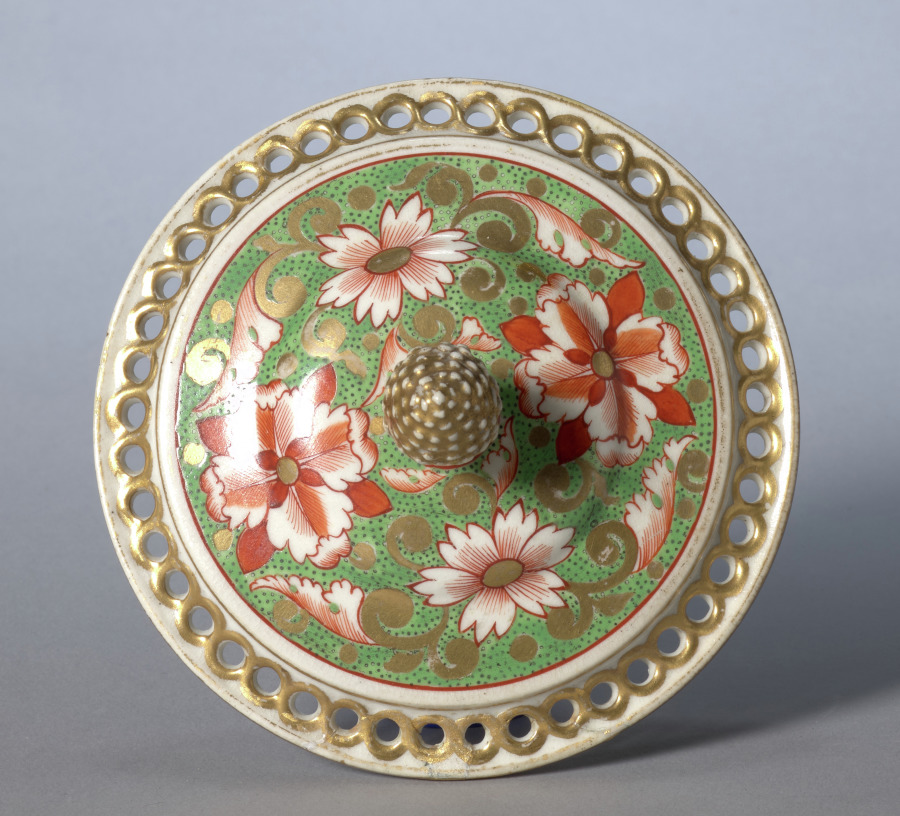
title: Cover for a Potpourri Vase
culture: England, Derby, 19th century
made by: Derby (Crown Derby Period) (British)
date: c. 1810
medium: porcelain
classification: Ceramic